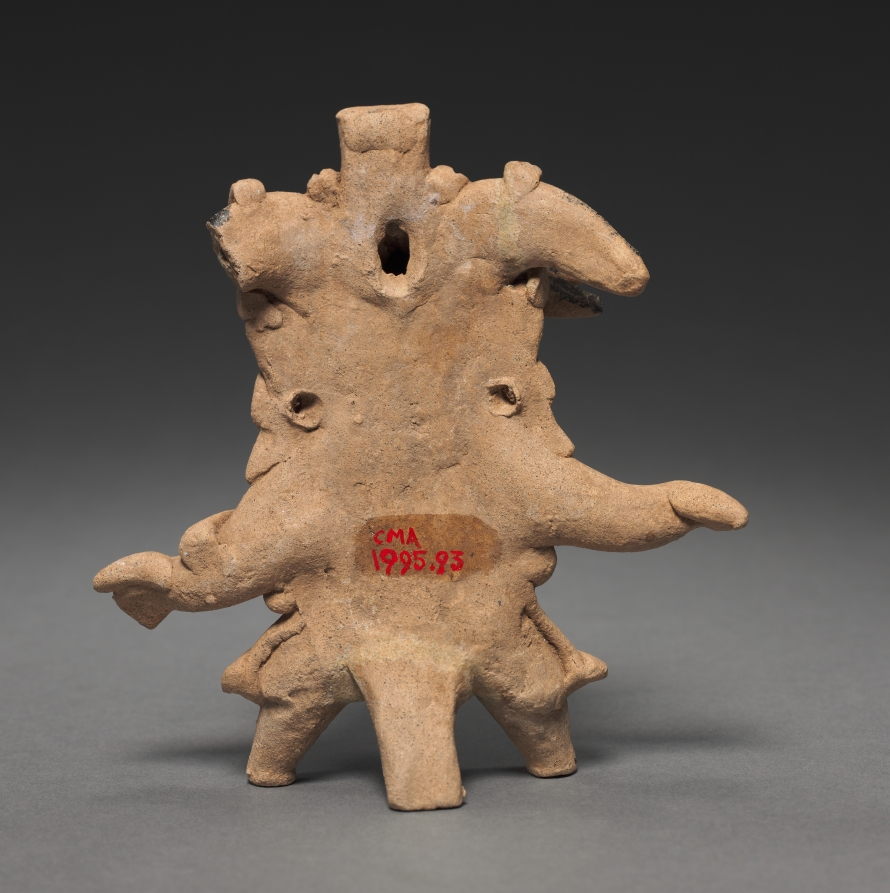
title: Tripod Whistle Figurine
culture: Mexico, Veracruz, Remojadas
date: c. 150–1 BCE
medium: earthenware with asphalt paint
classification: Sculpture